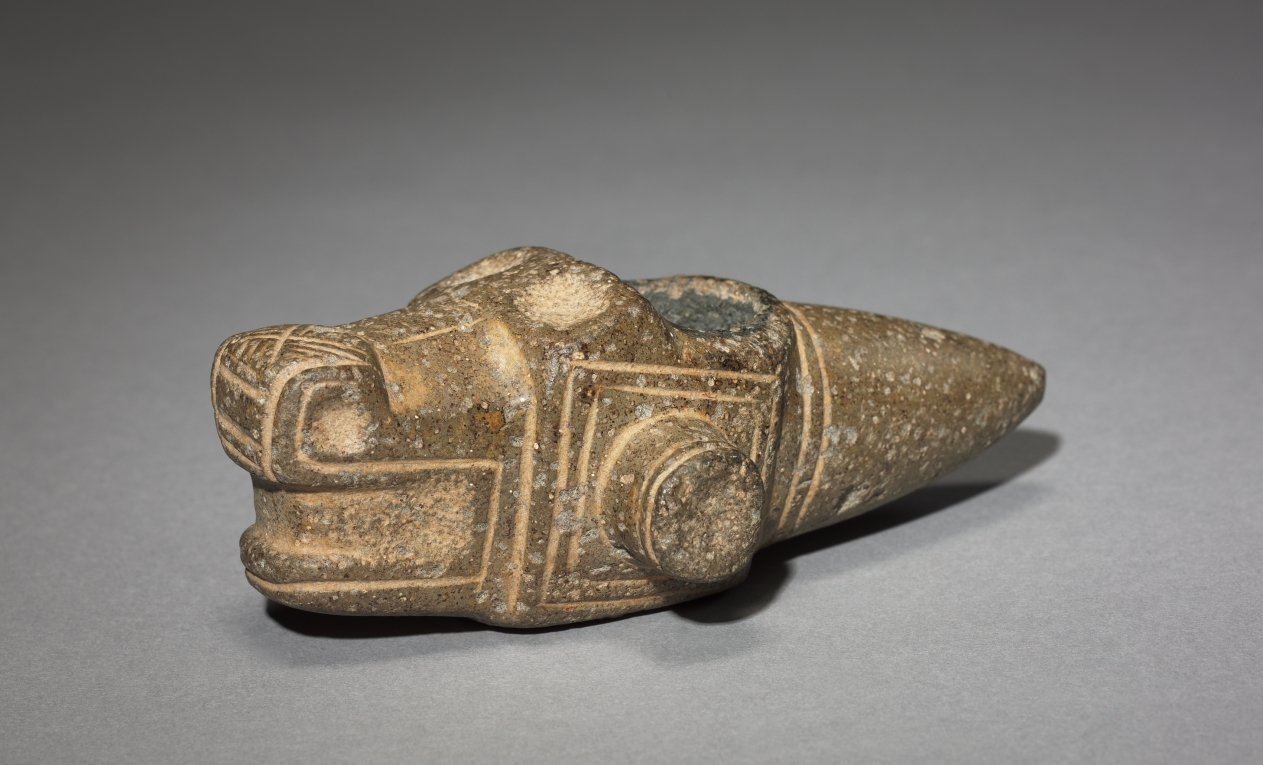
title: Mace Head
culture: Costa Rica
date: 300–500 CE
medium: pecked and polished gray stone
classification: Sculpture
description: Once mounted on wooden shafts, elaborately shaped mace (club) heads like this one probably were not used as weapons. Rather, they could have served as emblems of chiefly authority, group insignia, the heads of ceremonial weapons, or all three. They eventually were placed in elite graves. The back-curled nose on this example may refer to a crocodile or caiman.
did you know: In ancient Costa Rica, it was believed that the world rested on the back of a crocodile.